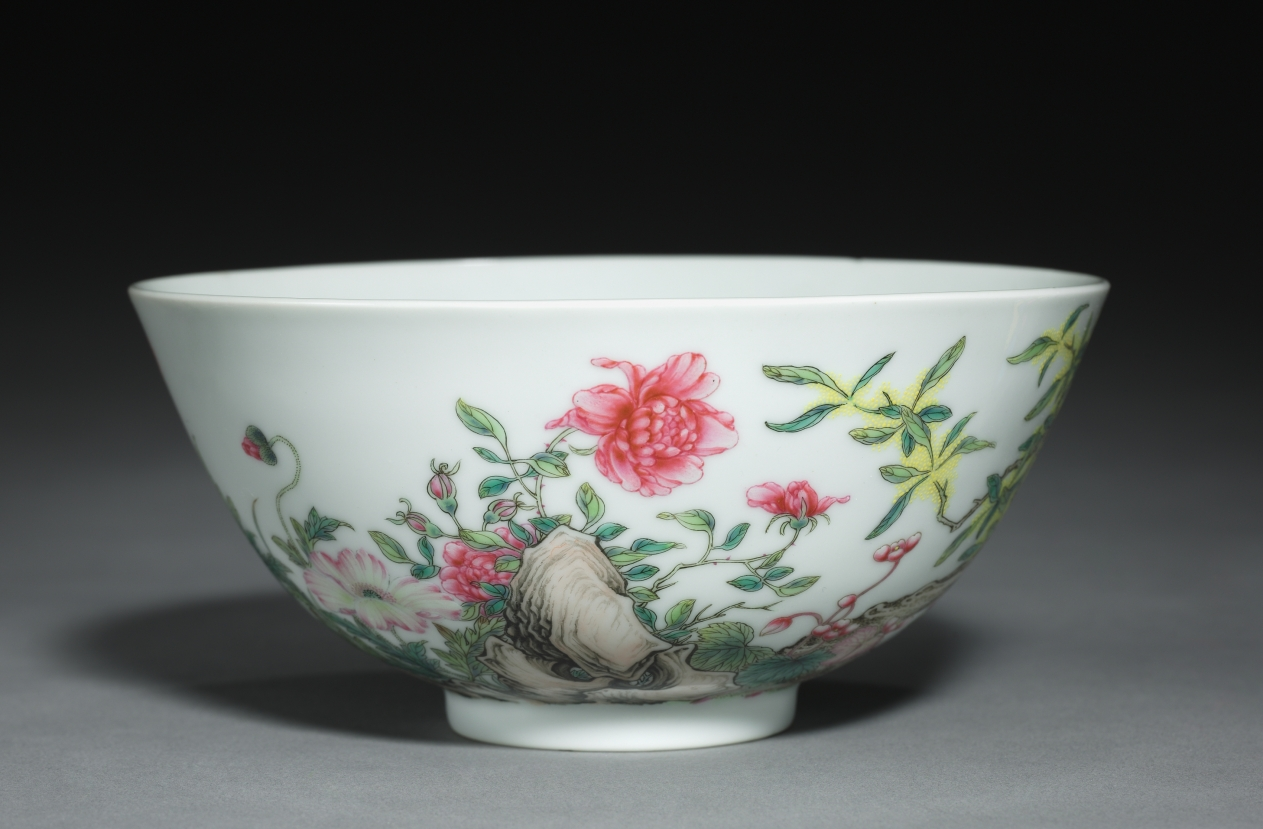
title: Bowl with Poppies, Tree Peony, and Flowering Mimosa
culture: China, Jiangxi province, Jingdezhen, Qing dynasty (1644-1911), Yongzheng mark and reign (1723-1735)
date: 1723–35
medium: porcelain with overglaze enamel decoration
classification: Ceramic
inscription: 大清雍正年制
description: Developments in enamel technology led to new possibilities in polychrome decoration. Pinks appeared, lending their name to the new palette of overglaze colors (famille rose), and the addition of opaque white allowed painters to vary the value of pigments, enhancing the painterly quality of porcelain decoration. As on painted scrolls and album leaves, the image is accompanied with a poem, in this case: "Branches come alive in the moonlight; Blossoms fill the autumn realms."